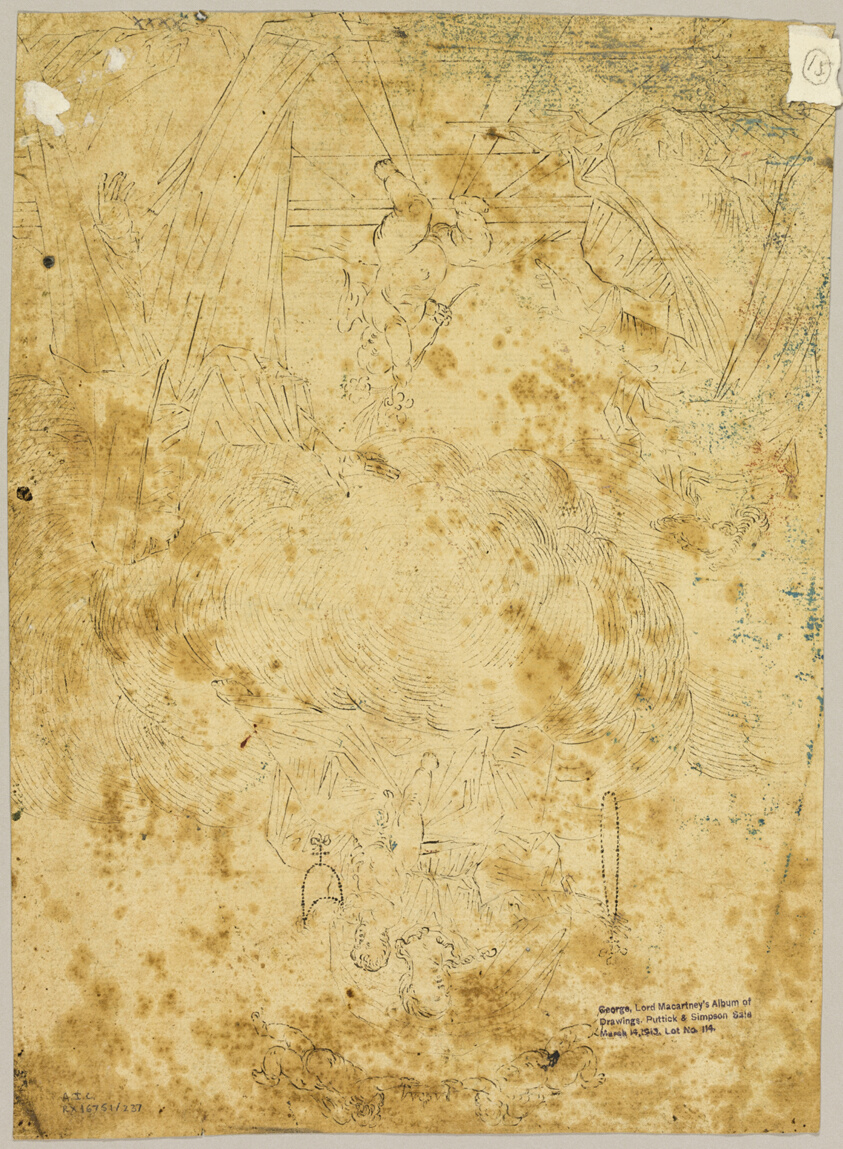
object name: Drawing and Watercolor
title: Rest on the Flight into Egypt (recto); Madonna of the Rosary (verso)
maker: After Federico Barocci; Italian, c. 1535-1612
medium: Oil paint (recto) and pen and black ink with off-set blue oil paint (verso) on tan laid paper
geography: Italy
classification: oil paintings (visual works); drawings (visual works); prints and drawing